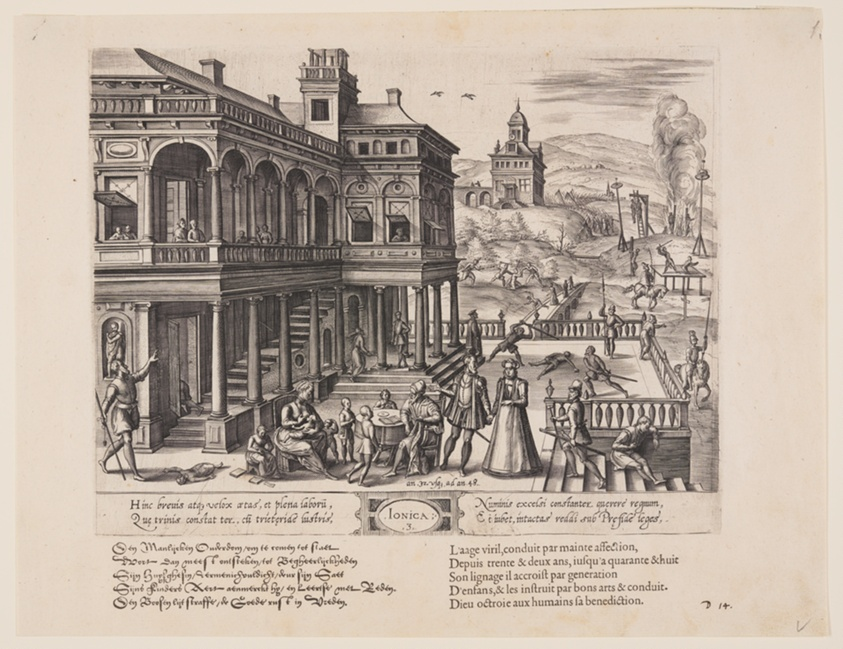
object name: Print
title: Ionica, from Theatrum Vitae Humanae (The Ages of Man)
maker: Jan Wierix (Flemish, 1549–c. 1618)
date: 1577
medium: Engraving on ivory laid paper, with letterpress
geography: Flanders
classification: engraving; paper; print; prints and drawing